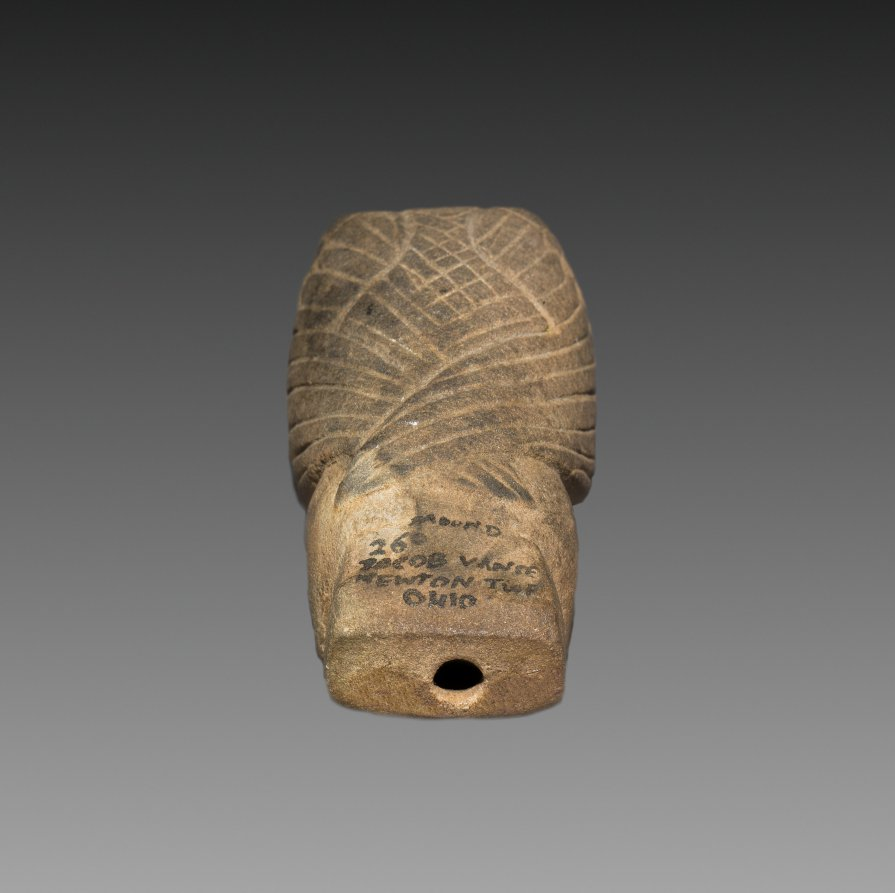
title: Bird Effigy Pipe Fragment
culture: Native North America, Adena people, Vance Mound, Newton Township, Licking County, Ohio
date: 400 BCE–100 CE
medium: sandstone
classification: Sculpture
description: The modest appearance of this small bird-effigy pipe, its head now lost, is misleading—the carving is fine and imagery, complex. The upper part takes the form of a bird’s body, the wings folded over the back. The section beneath the bird’s breast, intact but difficult to read, may depict a human torso with a pronounced navel and upraised forearms and hands, the palms facing outward. If so, one creature could be carrying or transforming into the other. The pipe was created by an artist of the ancient Adena people of southern Ohio. Smoke traveled through an interior channel to the mouthpiece, a small hole on the underside.